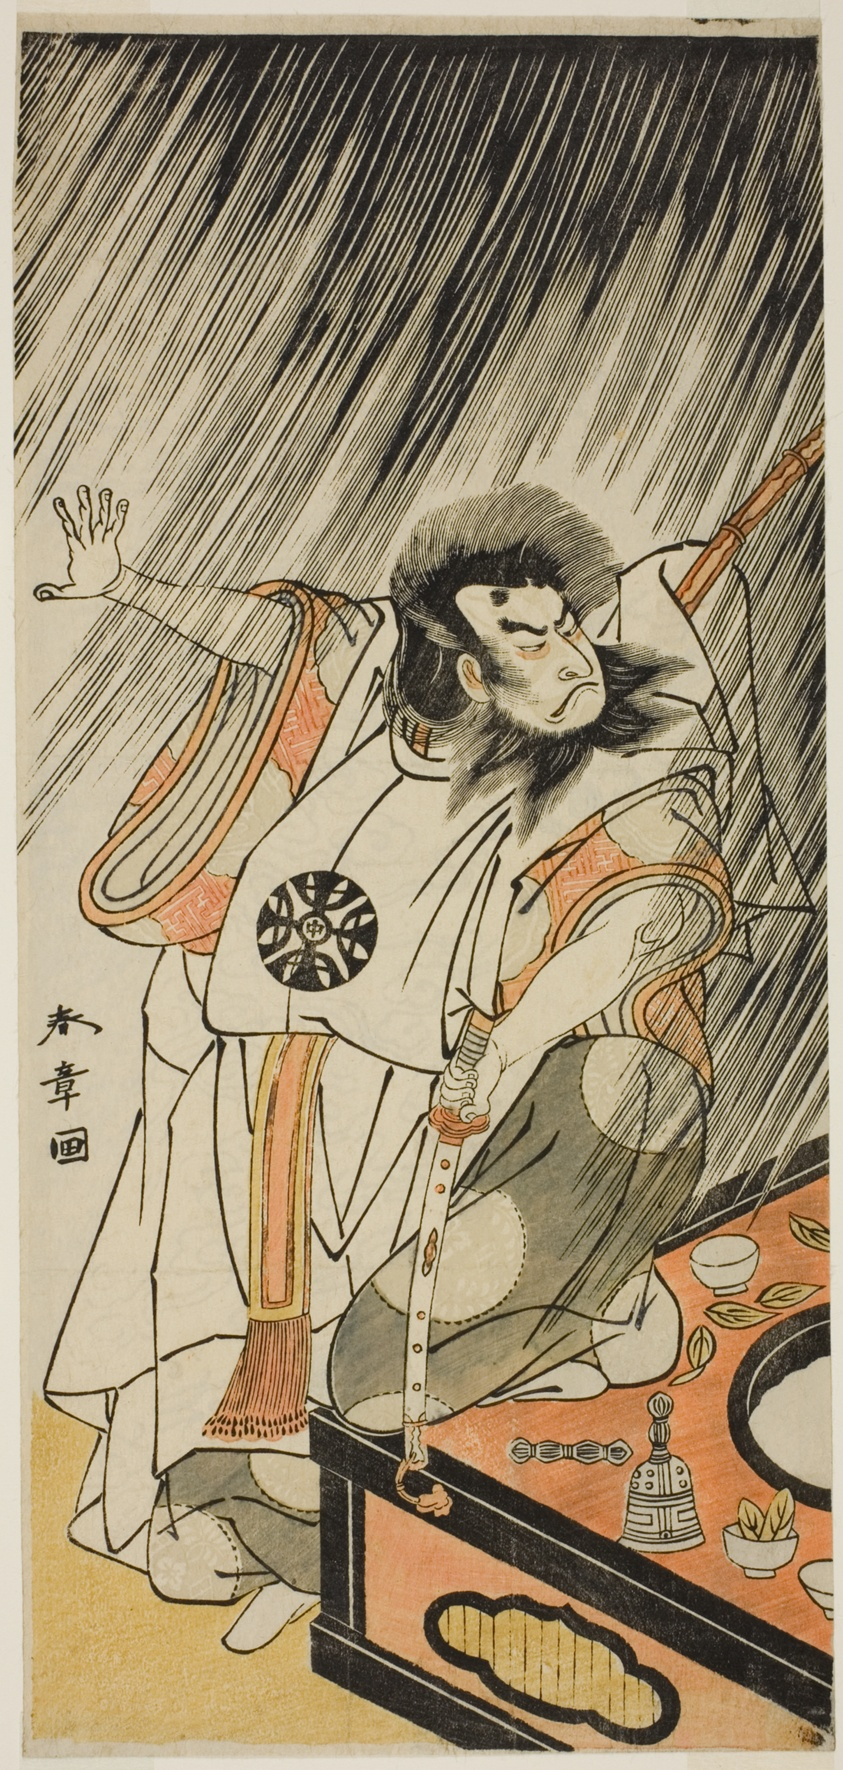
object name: Print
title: The Actor Nakamura Nakazo I in the Role of an Evil Courtier, Probably Prince Takahito, Illegitimate Son of Emperor Takakura, Disguised as Aso no Matsuwaka, in Part One of the Play Iro Moyo Aoyagi Soga (Green Willow Soga of Erotic Design), Performed at the Nakamura Theater from the Thirteenth Day of the Second Month, 1775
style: Japanese (culture or style)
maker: Katsukawa Shunsho 勝川 春章; Japanese, 1726-1792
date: c. 1775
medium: Color woodblock print; hosoban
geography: Japan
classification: woodblock print; print; asian art